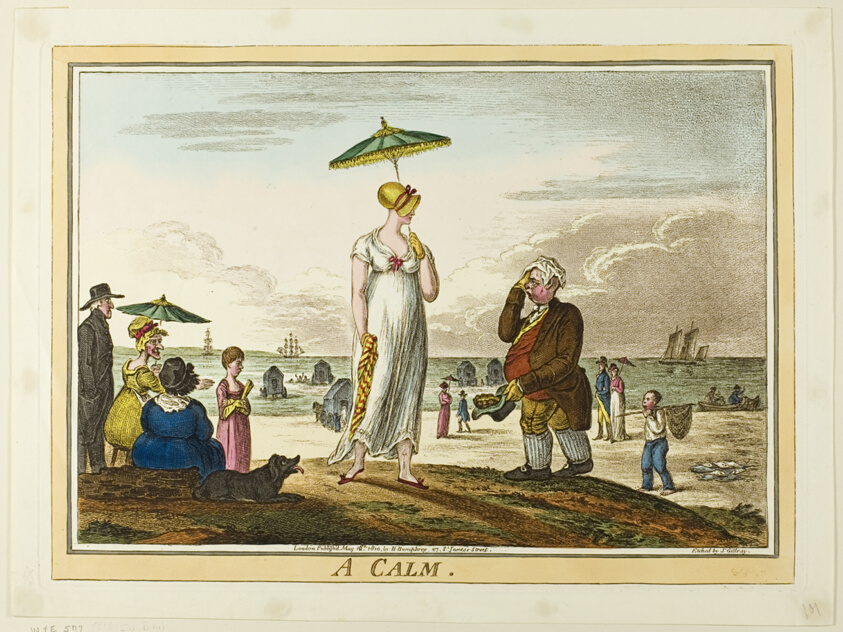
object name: Print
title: A Calm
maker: James Gillray (English, 1756-1815); published by Hannah Humphrey (English, c. 1745-1818)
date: published May 16, 1810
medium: Hand-colored etching on paper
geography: England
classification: etching; print; prints and drawing